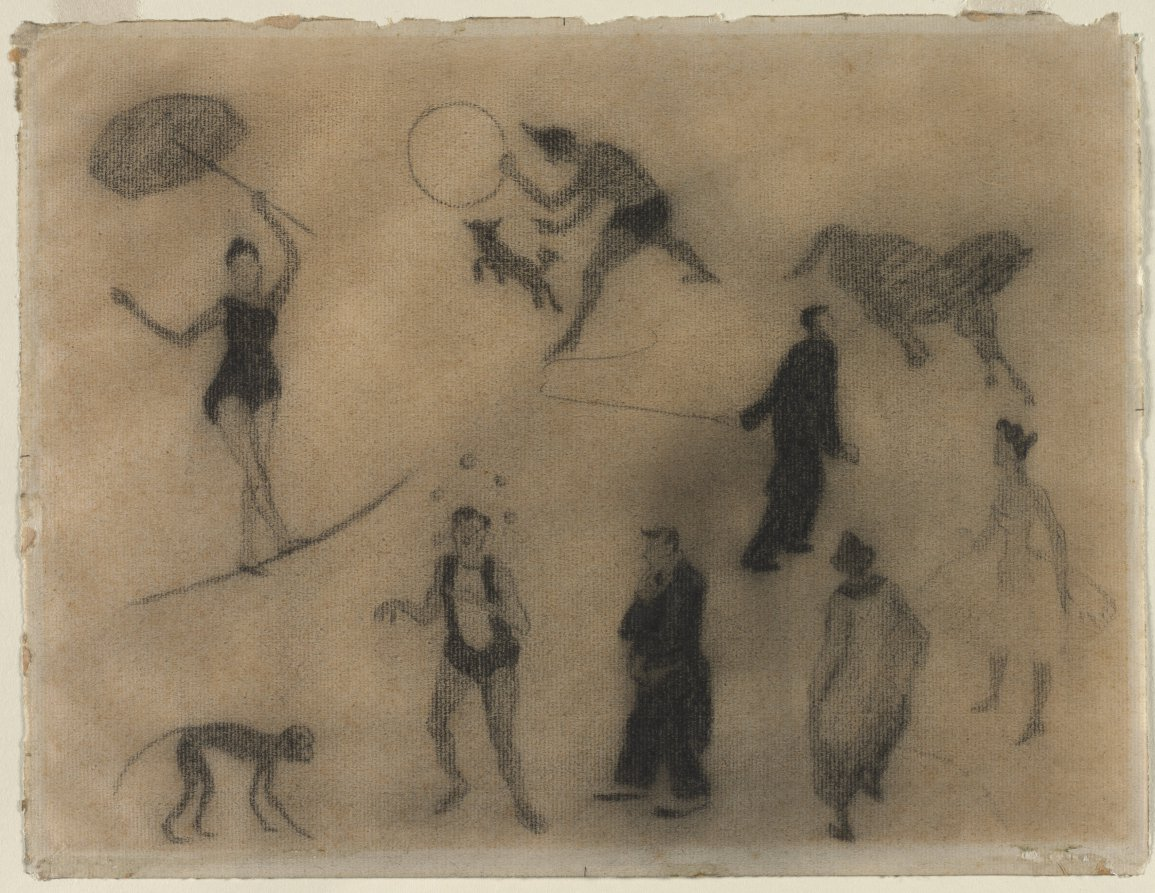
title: The Circus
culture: France, 19th century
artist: Henri Gabriel Ibels (French, 1867–1936)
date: 1896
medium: charcoal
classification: Drawing